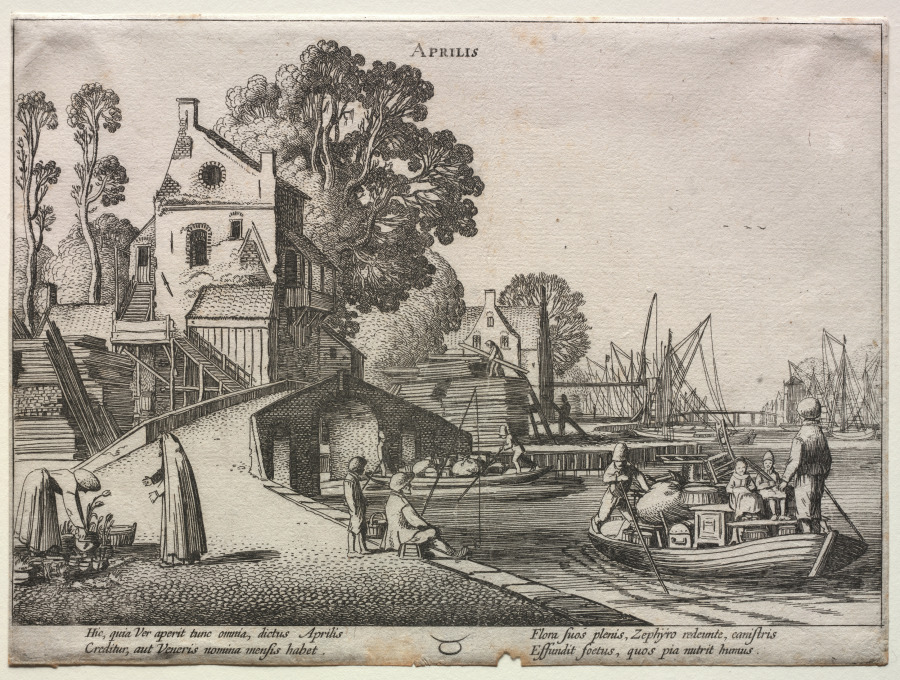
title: The Twelve Months: April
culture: Netherlands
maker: Jan van de Velde II (Dutch, 1593–1641)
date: 1608–18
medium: etching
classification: Print